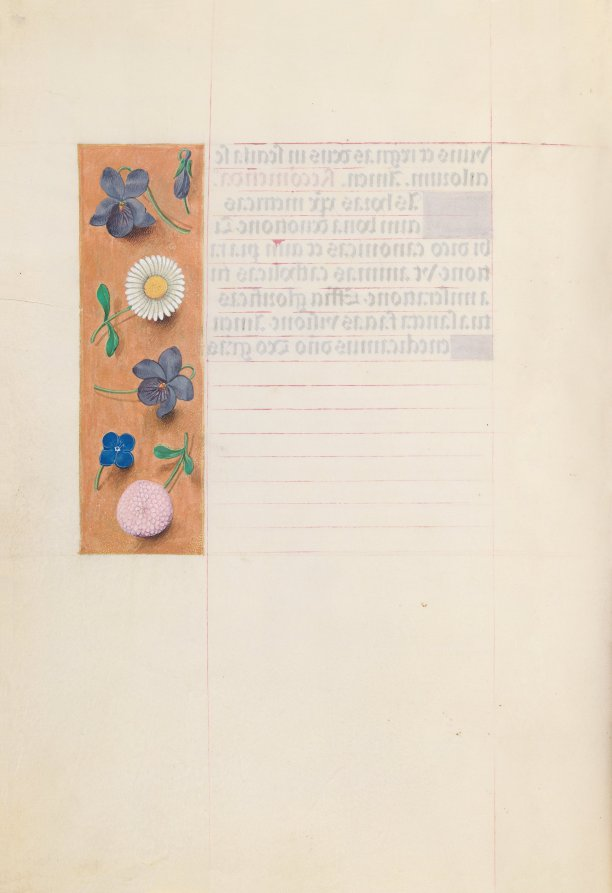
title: Hours of Queen Isabella the Catholic, Queen of Spain: Fol. 30v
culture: Flanders, Ghent and Bruges, late 15th century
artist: Master of the First Prayerbook of Maximillian (Flemish, c. 1444–1519)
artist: and Associates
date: c. 1500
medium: ink, tempera, and gold on vellum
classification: Bound Volume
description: A great lover of Flemish art, Queen Isabella treasured her many devotional books. This deluxe manuscript was created for her private devotions by highly organized and distinctly talented manuscript painters active in Ghent and Bruges. The Ghent-Bruges school represents the culmination of Flemish book painting, whose main features were the use of rich colors, illusionistic effects, a love of landscape, and a strong sense of visual narrative. Manuscripts produced by this circle of artists are renowned for their border decoration featuring a rich variety of realistically painted flowers, scrolling acanthus leaves, birds, and butterflies.